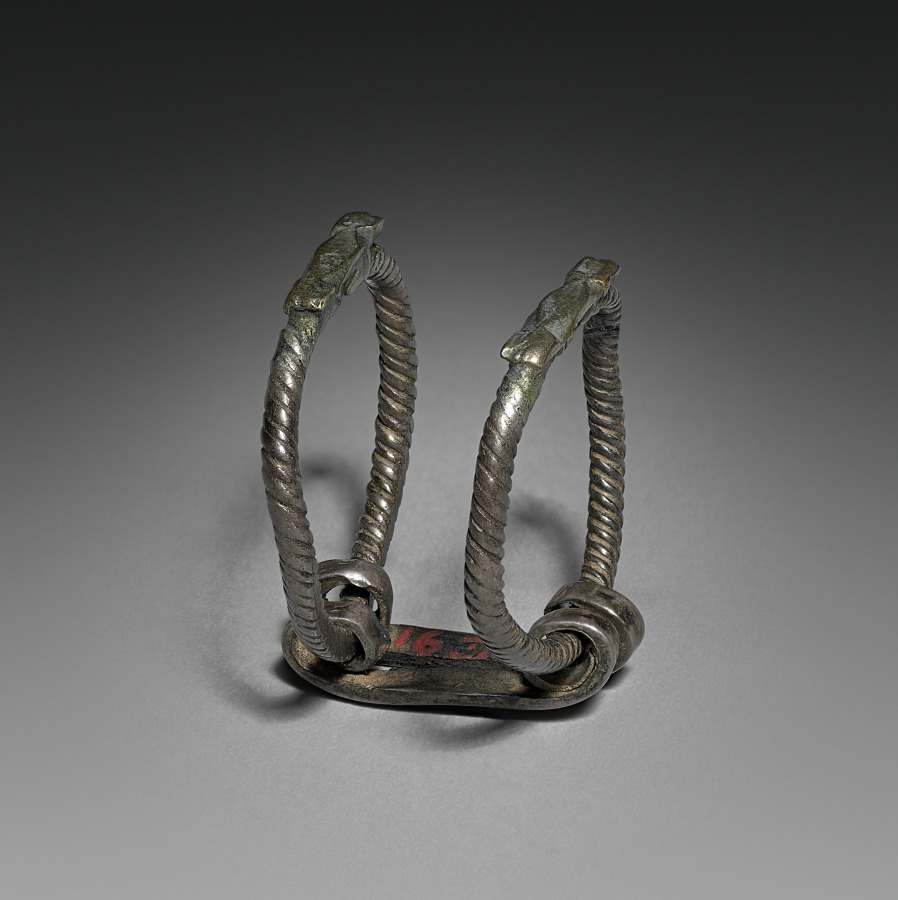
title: Ring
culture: India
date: 20th Century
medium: silver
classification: Jewelry